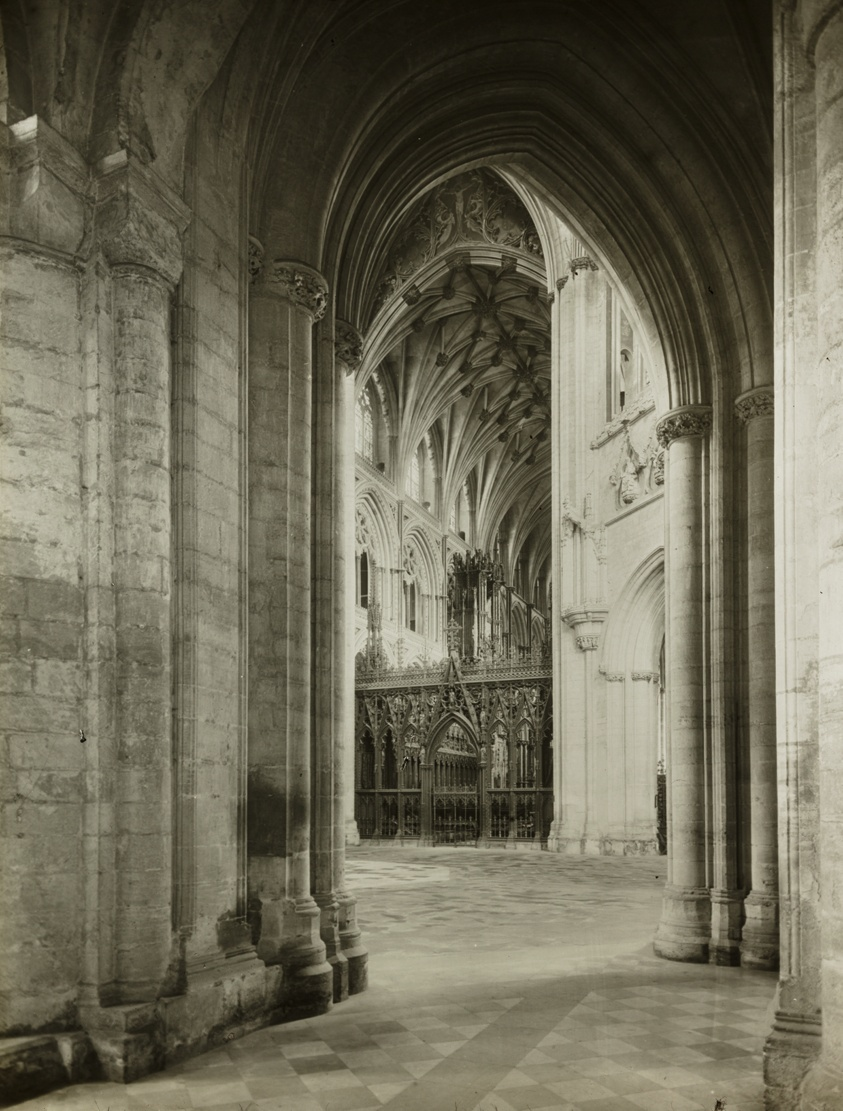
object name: Photograph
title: Ely Cathedral: Octagon from South Aisle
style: Pictorialism, 19th century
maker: Frederick H. Evans (English, 1853–1943)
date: c. 1891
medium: Lantern slide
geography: England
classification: photograph; photography